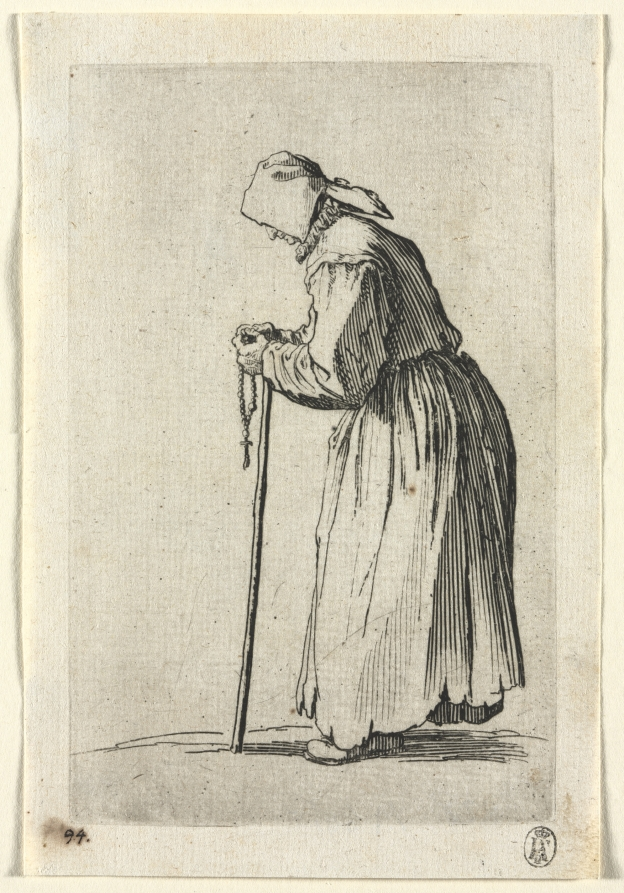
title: The Beggars: Beggar at Her Rosary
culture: France, 17th century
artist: Jacques Callot (French, 1592–1635)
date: c. 1623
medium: etching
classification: Print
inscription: Inscribed lower left in pen and brown ink: "94."